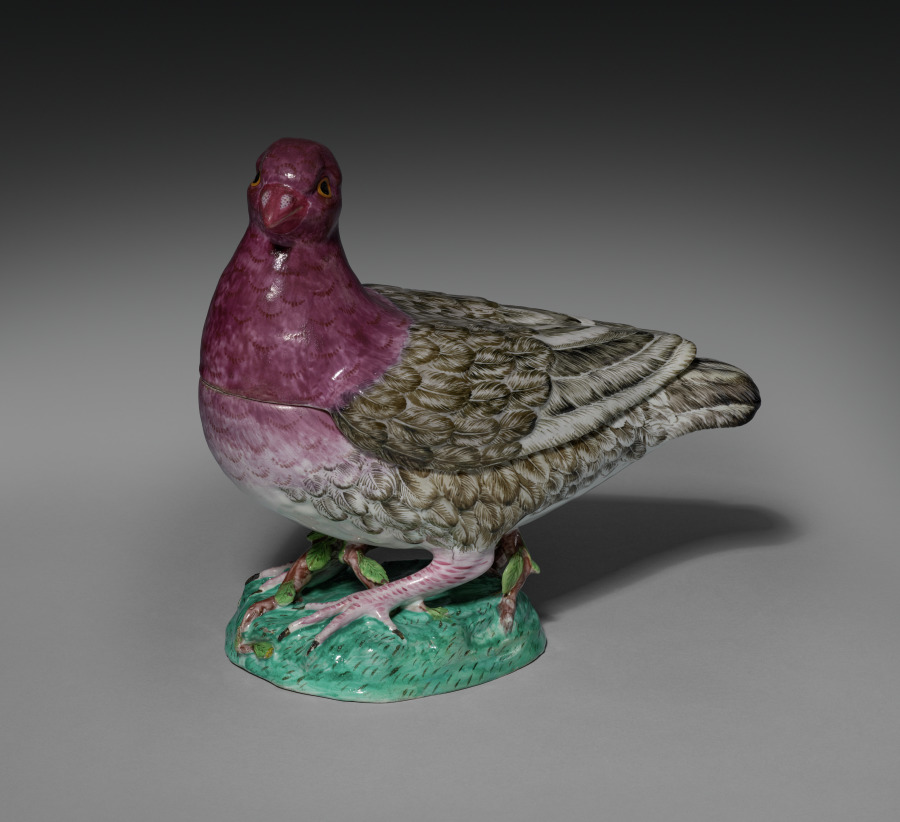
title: Covered Tureen in the Form of a Pigeon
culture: France, 18th century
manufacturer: Sceaux Factory (French, active 1748–66)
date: c. 1760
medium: Tin- glazed earthenware (faience) wth enamel decoration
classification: Ceramic